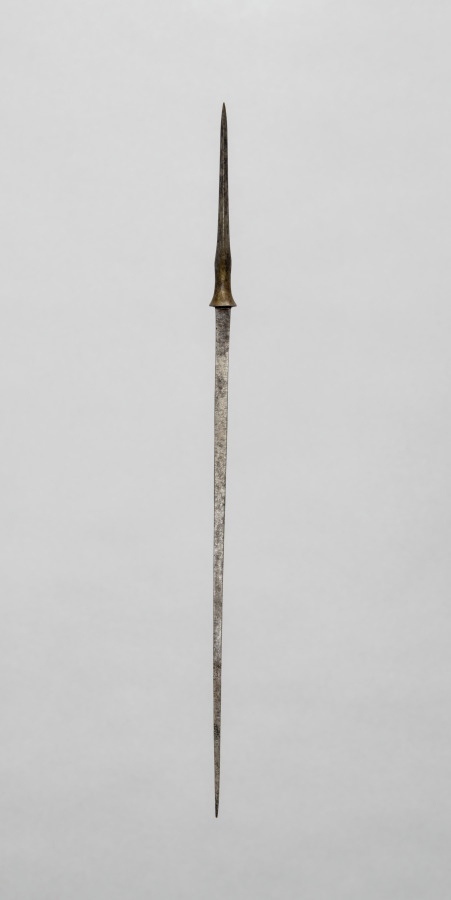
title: Arrow Point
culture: Japan, Edo period (1615–1868)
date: 1700s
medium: steel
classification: Arms and Armor